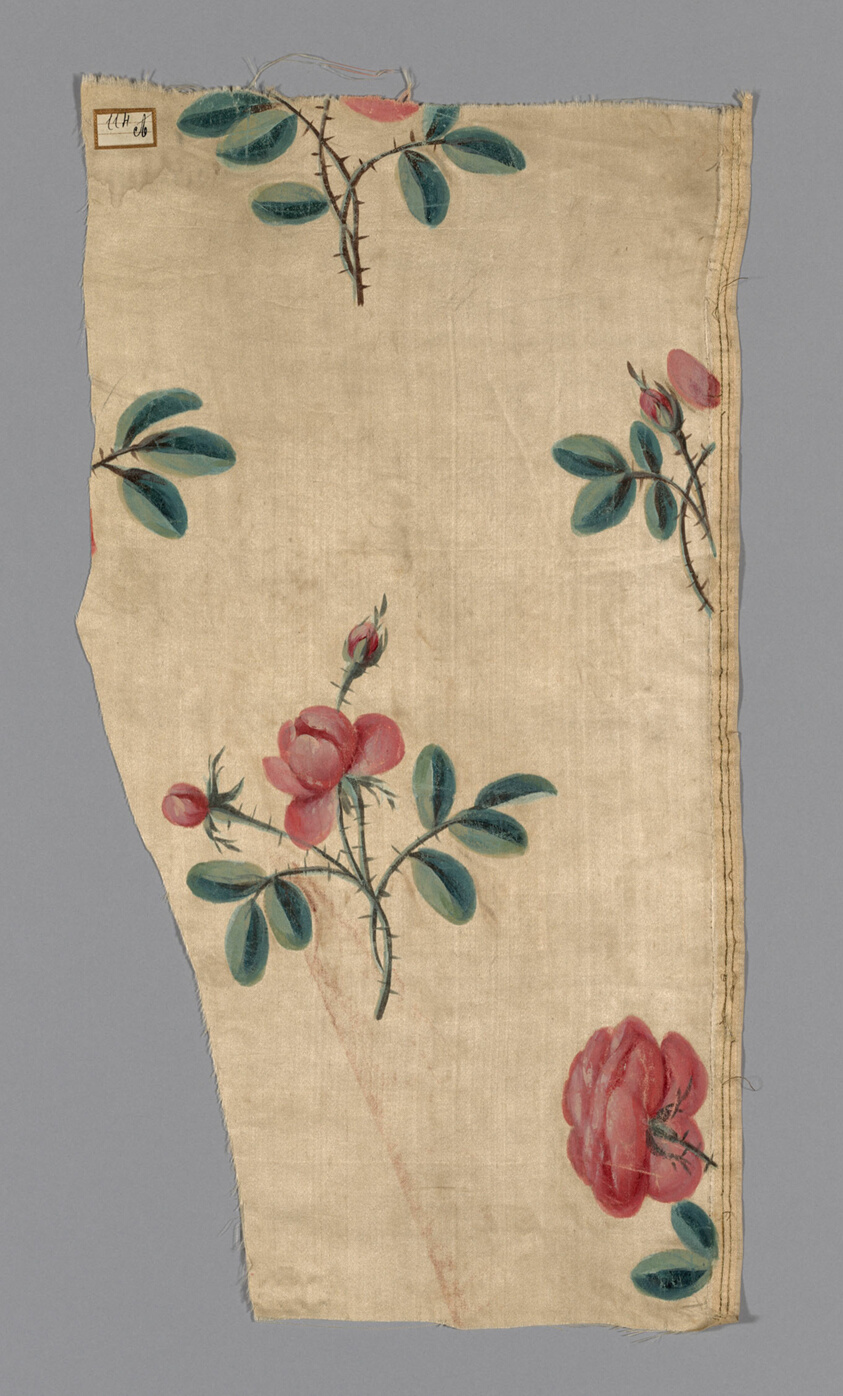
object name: Textile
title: Fragment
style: qing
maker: China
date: 18th century, Qing dynasty (1644–1911)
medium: Silk, plain weave, painted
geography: China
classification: textile; weaving - printed